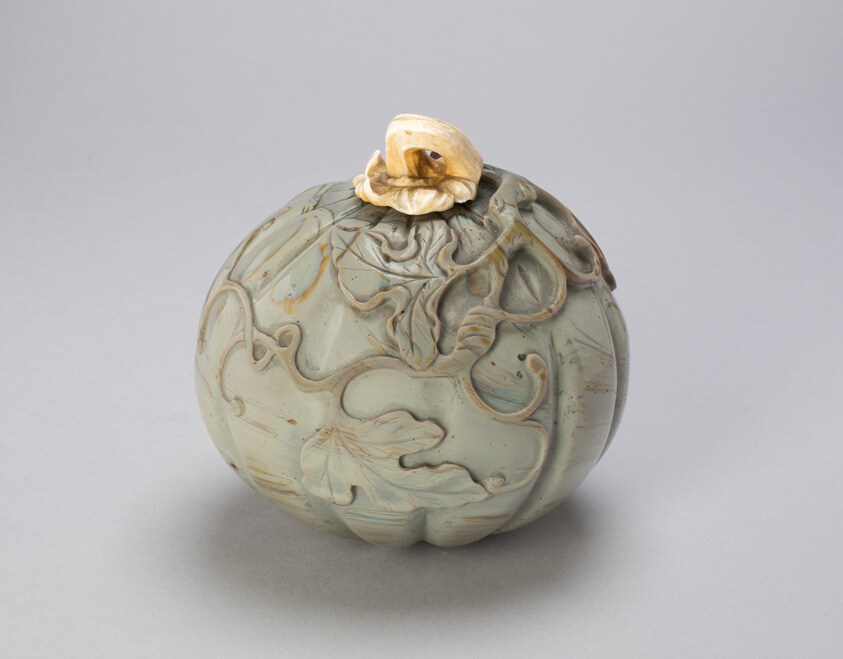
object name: Vessel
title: Melon-Shaped Water Pot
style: Chinese (culture or style)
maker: China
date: Qing dynasty (1644–1911), 18th century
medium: Gray opaque glass with ivory lid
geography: China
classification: jade; asian art; vessel